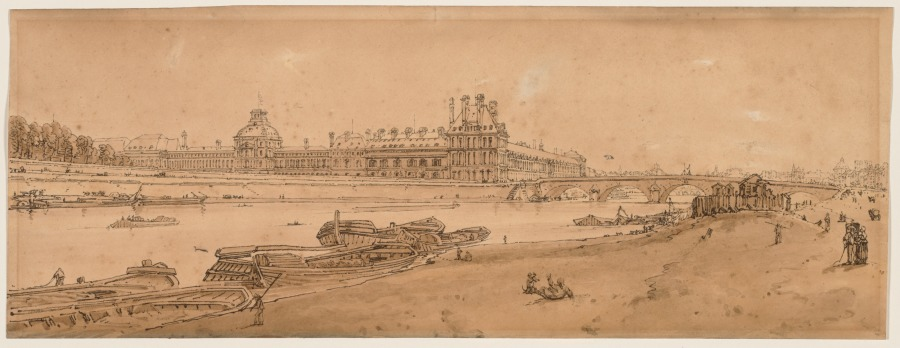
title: A Selection of Twenty of the Most Picturesque Views in Paris: View of the Tuilleries and Bridge taken from Quay d'Orsay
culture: England, early 19th Century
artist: Thomas Girtin (British, 1775–1802)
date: 1802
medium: soft-ground etching with bistre wash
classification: Print